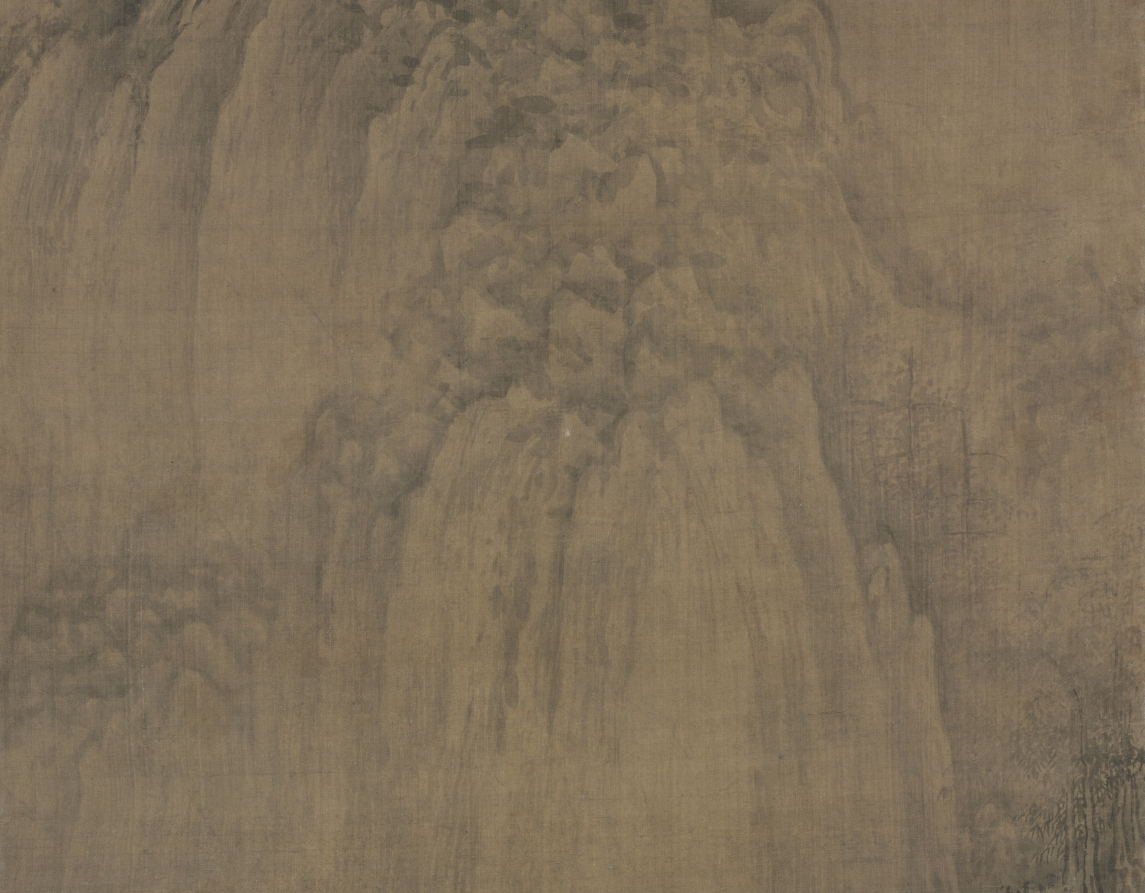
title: Buddhist Retreat by Stream and Mountains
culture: China, Northern Song dynasty (960-1127)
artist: Juran (Chinese, active 960–985)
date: 960–85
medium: Hanging scroll; ink on silk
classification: Painting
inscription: The upper portion of the scroll: the two small characters, “Ju wu 巨五”, written near the large seal. Written by a functionary in Shang Shu Sheng (the Department of State Affairs) when the painting was first received.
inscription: The upper portion of the scroll: the large seal, “Shang Shu Sheng yin 尚書省印” (seal of the Department of State Affairs)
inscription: The upper portion of the scroll: the half-seal “Si yin 司印”, seen along a border. Attributed to 典禮紀察司 of Ming dynasty.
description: Monk Juran served the Southern Tang (937–75) imperial house in Nanjing, where he studied with Dong Yuan (active 930s–60s). Both founded the southern landscape tradition, or Jiangnan school, known for gentle misty riverscapes in wet ink. Juran moved north to Kaifeng when the Southern Tang surrendered to the Northern Song, the impact of which may be seen in this painting, presumably painted after 976. A towering mountain dominates the composition, typically representing the style of the Northern Song academy; while the use of long hemp fiber strokes to texture the mountains, wet dots, and round boulders on mountain tops are elements of the southern landscape tradition.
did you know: This hanging scroll with the towering mountain is a prime example of the monumental landscape style of Northern Song.